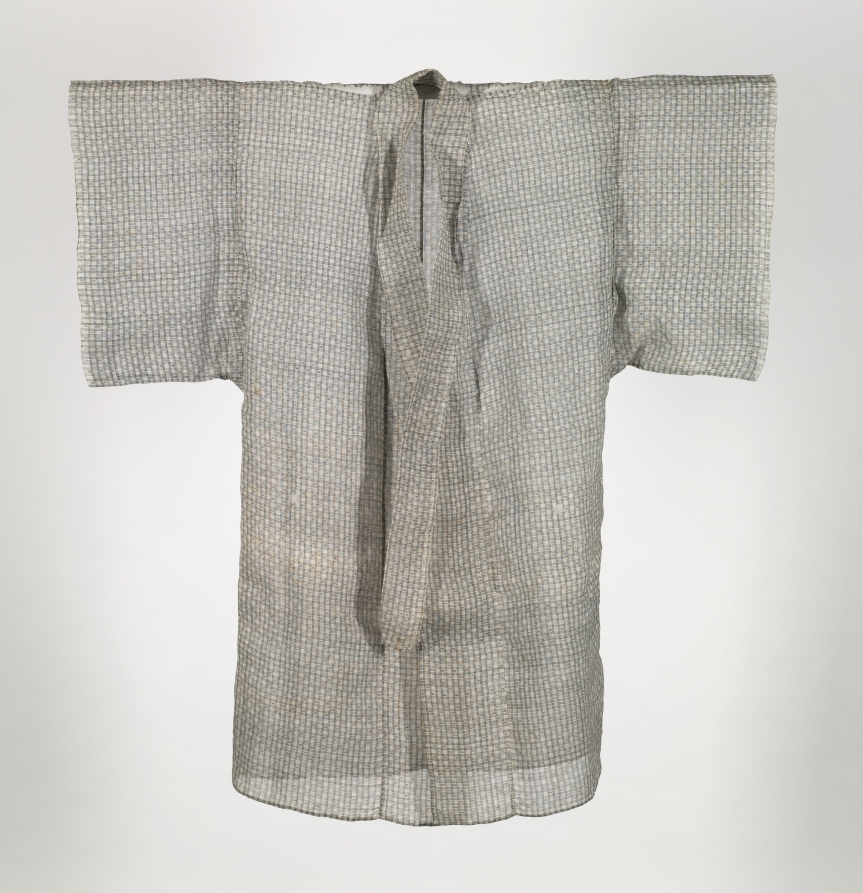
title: Robe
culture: Japan, Edo period (1615–1868)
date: early 1800s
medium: banana cloth, tabby weave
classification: Garment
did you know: This robe was produced in the Ryukyu Islands, a chain of islands between Kyushu and Taiwan.